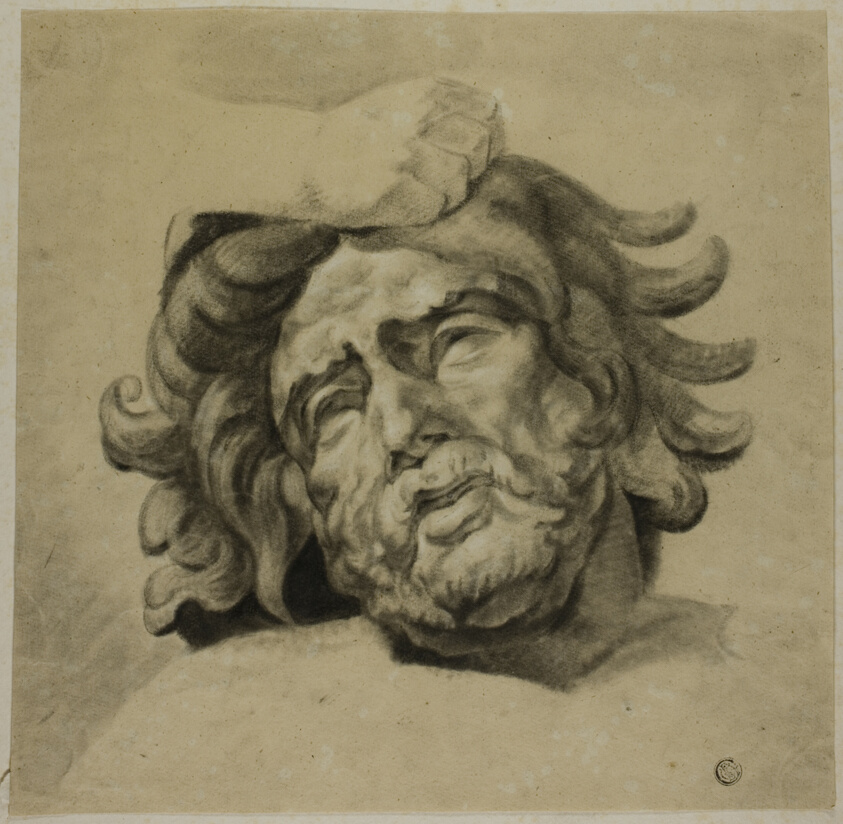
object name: Drawing and Watercolor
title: Hand of Centaur Grasping Head of Lapith (after One of Metopes from Parthenon, British Museum)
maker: Unknown Artist; English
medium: Black chalk, heightened with white chalk, on cream wove paper, tipped onto ivory laid paper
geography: United Kingdom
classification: charcoal; drawings (visual works); prints and drawing